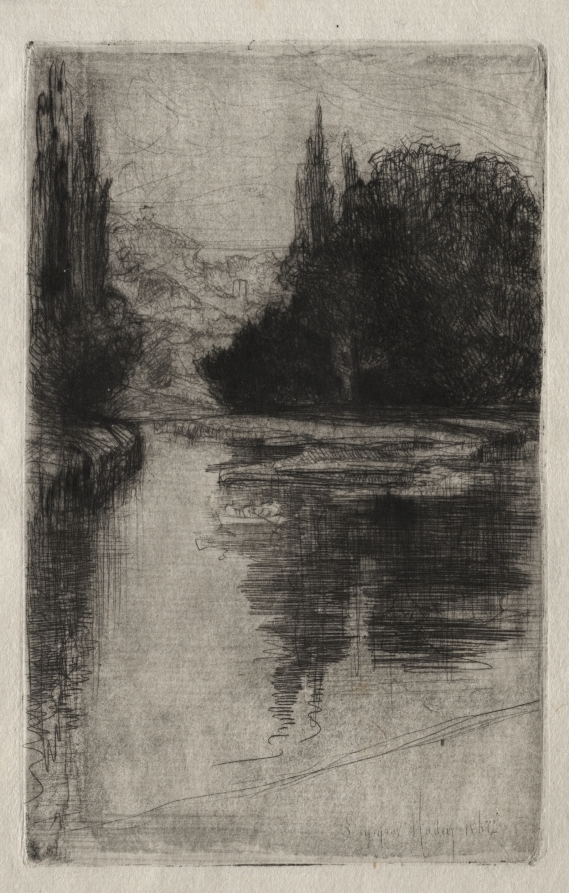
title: Evening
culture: England, 19th century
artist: Francis Seymour Haden (British, 1818–1910)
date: 1864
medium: etching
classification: Print